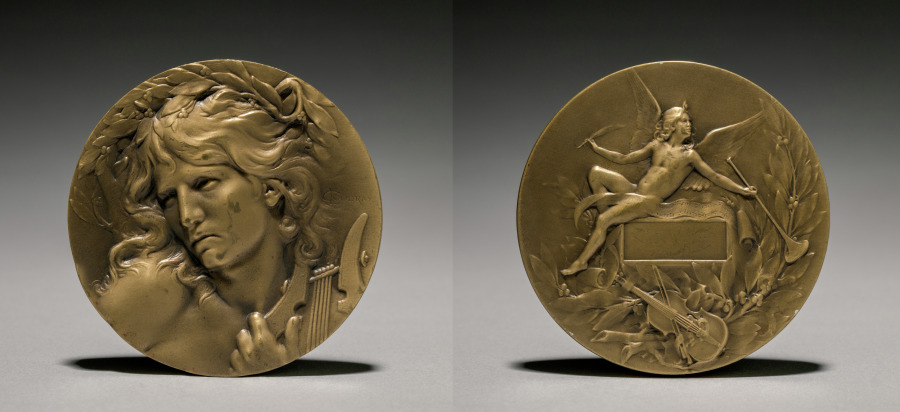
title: Medal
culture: France, 20th century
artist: Marie Alexandre Lucien Coudray (French, 1864–1932)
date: 1900s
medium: bronze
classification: Metalwork